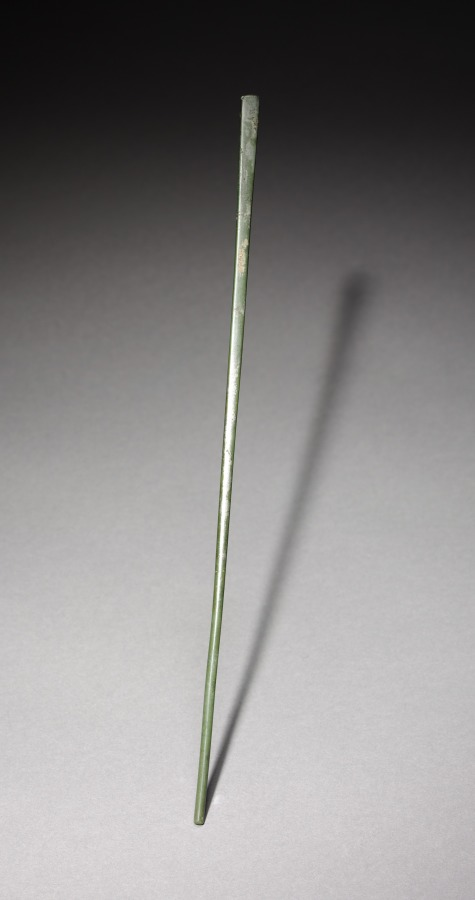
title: A Pair of Chopsticks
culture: Korea, Goryeo dynasty (918–1392)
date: 918–1392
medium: bronze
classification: Metalwork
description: In Korea, chopsticks made of metal such as brass, silver, and gold were excavated from ancient tombs and ruins dated to the 6th century at the earliest. Burial goods often include utilitarian objects such as table wares and utensils because the dead were believed to need them in the afterlife.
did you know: In contrast to the Chinese and Japanese, Koreans still prefer metal chopsticks (stainless steel and brass) to wooden ones.